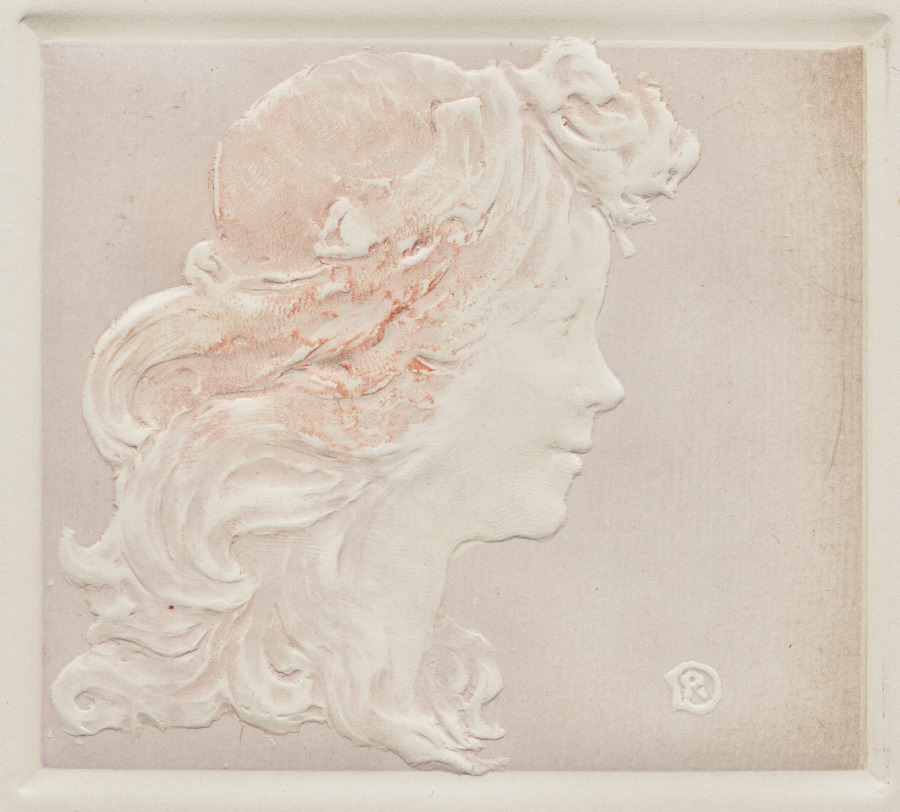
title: Profile of a Woman's Head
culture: France, early 20th Century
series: La Loïe Fuller, by Roger Marx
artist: Pierre Roche (French, 1855–1922)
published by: Les Cents Bibliophiles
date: 1904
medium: gypsograph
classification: Bound Volume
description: Although best known as a sculptor, Roche was a versatile and prolific artist who worked in many mediums. Loïe Fuller, the pioneer of modern dance who took Paris by storm in 1892, was one of his favorite subjects. He portrayed her in clay, bronze, marble, plaster, and in a series of gypsographs that illustrated an essay by the art critic Roger Marx. The book was described as "a precious monument to Loïe Fuller."